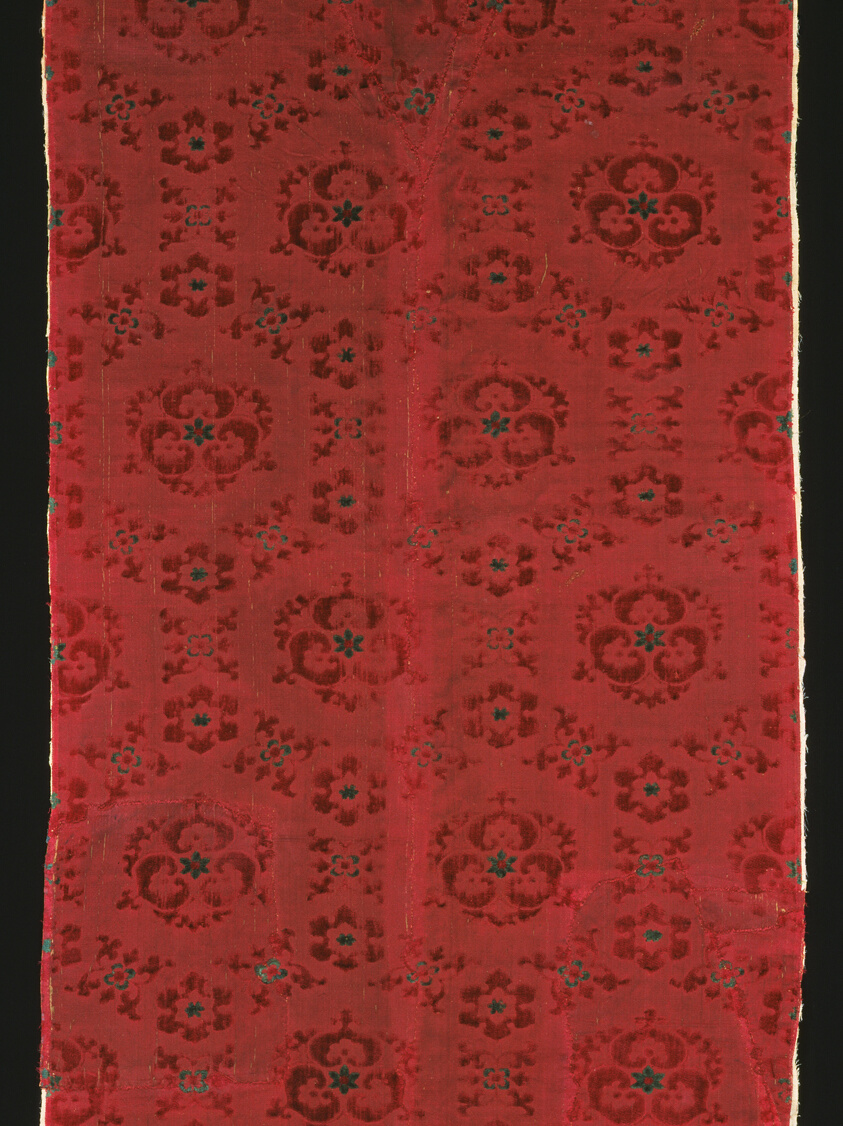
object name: Textile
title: Panel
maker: Italy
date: 1401/25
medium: Silk, warp-float faced 4:1 satin weave with two-color supplementary pile warps forming cut, voided velvet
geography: Italy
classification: textile; weaving; weaving - velvet